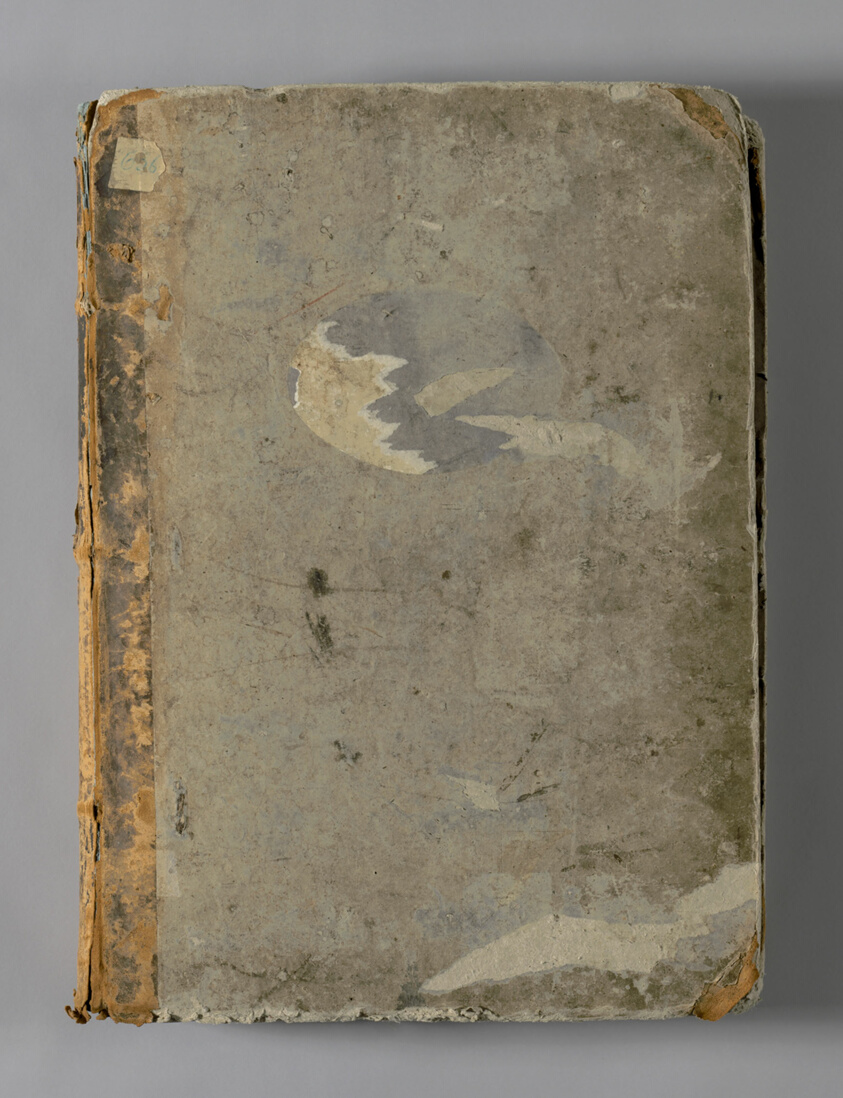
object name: Book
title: Sample book of swatches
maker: Mulhouse, France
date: 19th c.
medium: Sample book of swatches: cotton, plain weave, block printed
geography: France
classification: book; printed; weaving - printed